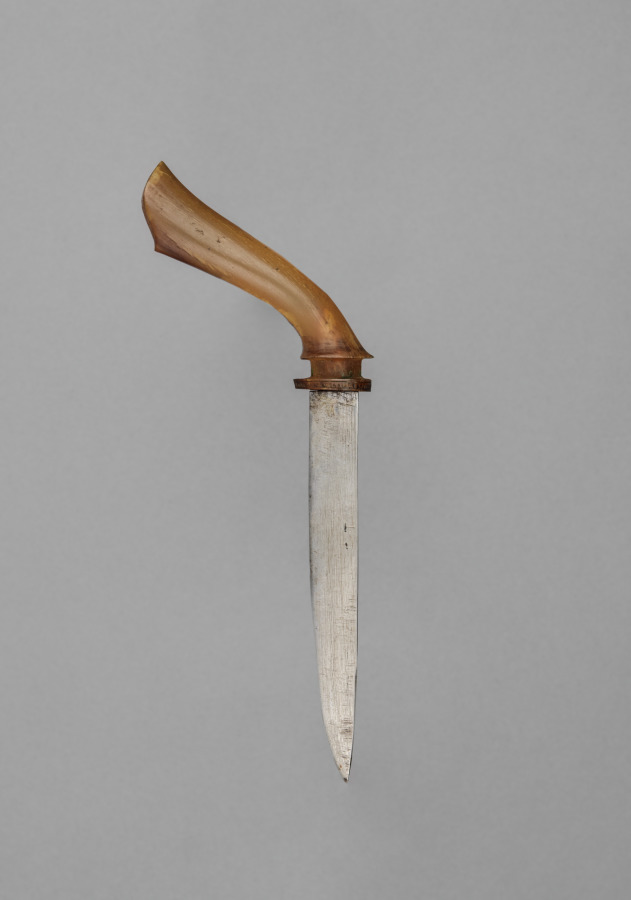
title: Dagger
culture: Sumatra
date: before 1916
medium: Blade: steel; handle: horn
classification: Arms and Armor